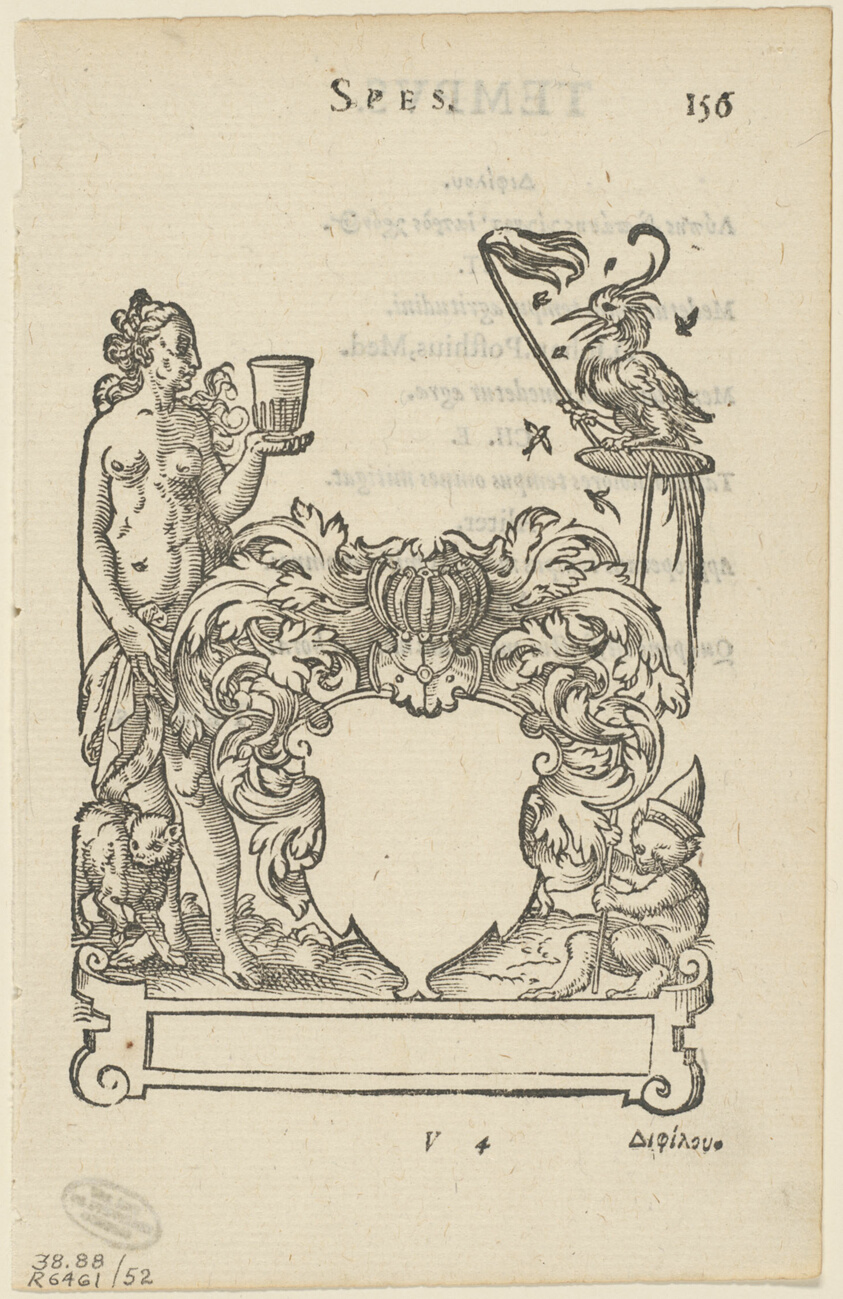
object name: Print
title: Emblem with Blank Heraldic Shield, folio 156 from the Anthologia Gnomonica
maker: Jost Amman (Swiss, 1539-1591); printed by Sigmund Feyerabend (German, 1527-1590); original text by Henri Estienne (French, 1528/31-1598); portfolio text by Max Geisberg (Swiss, 1875-1943)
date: 1579, assembled into portfolio 1937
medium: Woodcut and letterpress in black on cream laid paper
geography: Switzerland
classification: woodcut; print; prints and drawing